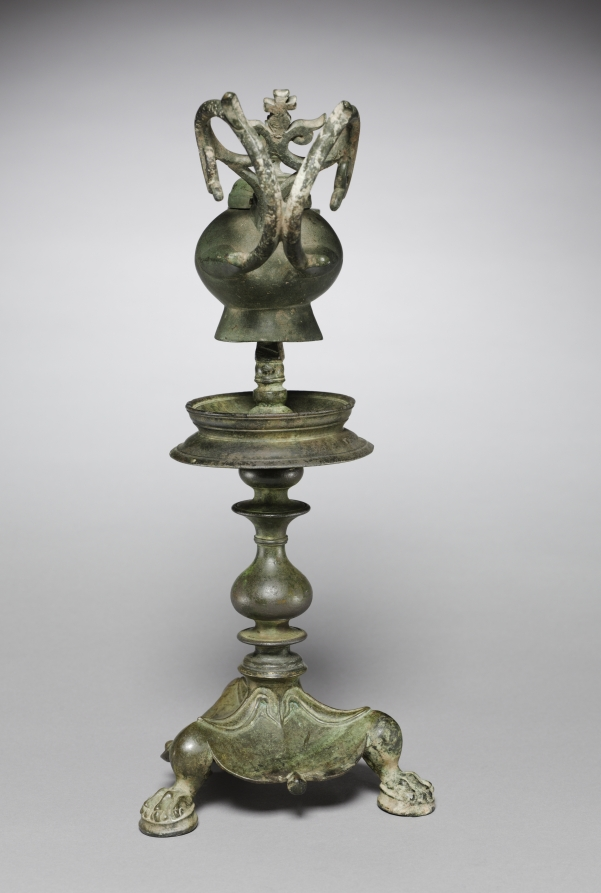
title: Lamp and Stand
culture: Byzantium, early Byzantine period, 5th century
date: 400s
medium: bronze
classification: Metalwork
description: Bronze oil lamps were made either with stands, like the nearby example, or with chains for suspension on hooks within homes and churches. This lamp is cast in the form of a griffin, a guardian figure from antiquity frequently used in Byzantine churches, which contained much wealth. The Christian monogram on the handle indicates the lamp was intended for use within a church.